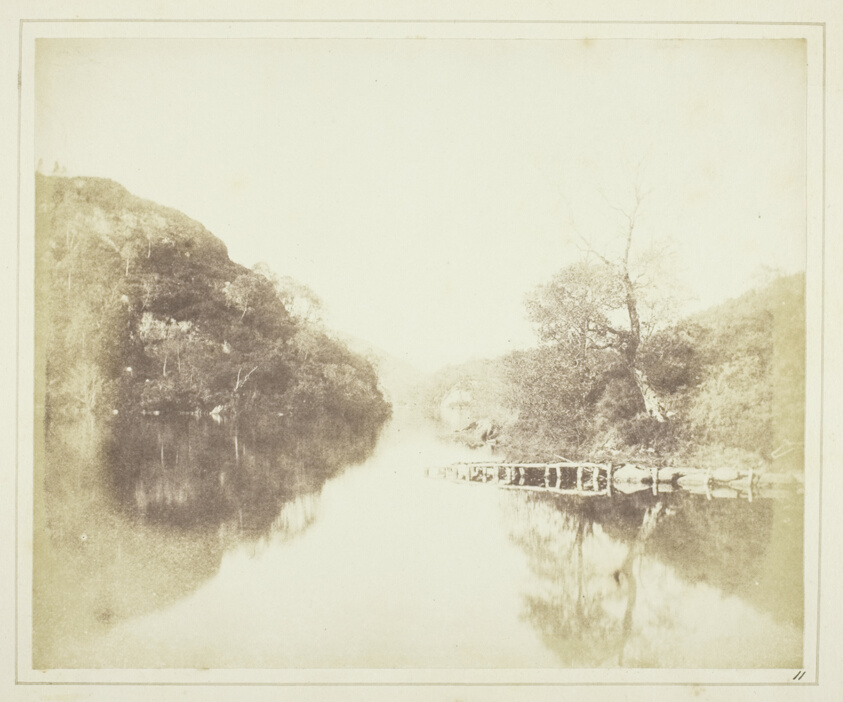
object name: Photograph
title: Loch Katrine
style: 19th century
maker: William Henry Fox Talbot (English, 1800–1877)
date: 1844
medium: Salted paper print, plate XI from the album "Sun Pictures in Scotland" (1845)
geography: England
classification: salted paper print; photographic process; photography; photograph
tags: Collected by Hugh Edwards